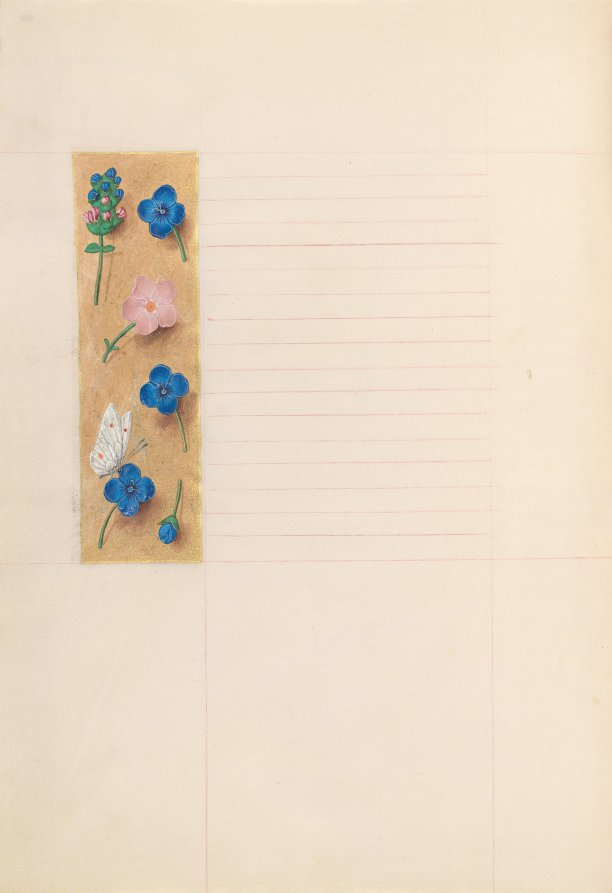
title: Hours of Queen Isabella the Catholic, Queen of Spain: Fol. 271v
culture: Flanders, Ghent and Bruges, late 15th century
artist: Master of the First Prayerbook of Maximillian (Flemish, c. 1444–1519)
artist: and Associates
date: c. 1500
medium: ink, tempera, and gold on vellum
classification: Bound Volume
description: This manuscript was illuminated by a circle of at least five highly organized manuscript painters active in the Flemish cities of Ghent and Bruges. The principal illuminator was Alexander Bening, who painted the majority of the book's miniatures. Manuscripts produced by this circle of artists are renowned for the decoration of their borders, which typically feature a rich variety of realistically-painted flowers, birds, and butterflies. This prayer book, called a book of hours, was intended not for a cleric, but for the private devotions of a lay person-in this case, Isabella the Catholic, Queen of Spain (1451-1504). Isabella's coat of arms embellishes the book's frontispiece. It is unlikely that the book was commissioned by the Queen herself; rather, she probably received it as a diplomatic gift from someone courting her patronage, perhaps Cardinal Francisco Jimenez de Cisneros. A Franciscan friar, Jimenez was dependent upon Isabella for his advancement, first to the post of Queen's confessor in 1492, and then to Archbishop of Toledo in 1495.